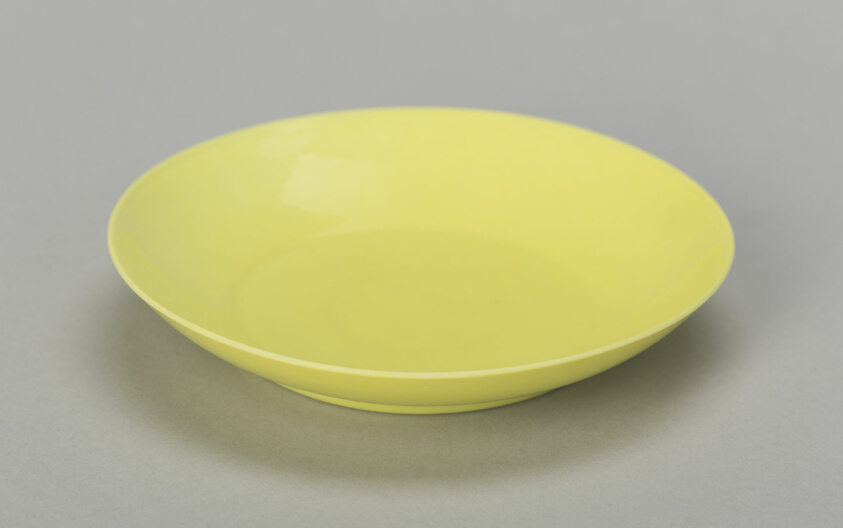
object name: Vessel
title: Saucer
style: Chinese (culture or style)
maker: China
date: Qing dynasty (1644–1911), Yongzheng reign mark and period (1723–35)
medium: Porcelain painted in overglaze enamel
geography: China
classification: porcelain; asian art; ceramics; vessel